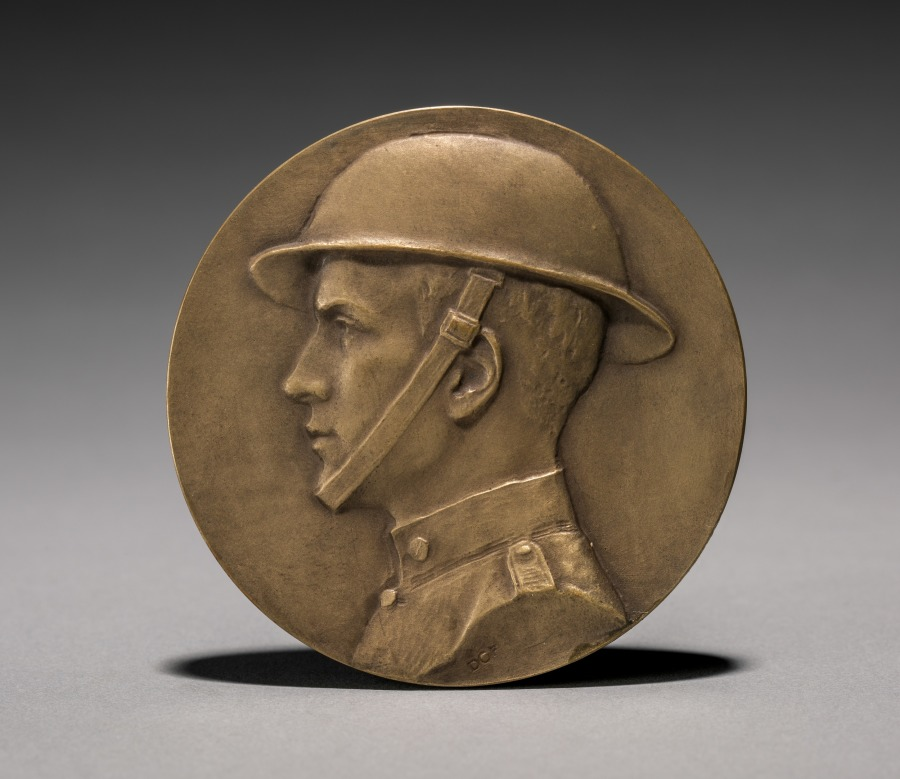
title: American Red Cross War Council Medal (obverse)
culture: America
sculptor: Daniel Chester French (American, 1850–1931)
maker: Medallic Art Company (American)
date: 1920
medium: bronze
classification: Metalwork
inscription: Obverse: impressed DCF [Daniel Chester French] under the image of a soldier facing left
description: This medal was the 42nd issue of the American Numismatic Society and co-issued by the American Red Cross in 1920. It was first struck in gold for the 12 members of the council of prominent New York businessmen who had advised the American Red Cross on its work during the First World War. Then 4 more were struck in silver and 205 in bronze, the group from which this medal comes.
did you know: The initials of artist Will Hicok Low (1853–1932) are inscribed on the reverse because he advised French to place the nurse in front of the soldier in the composition.